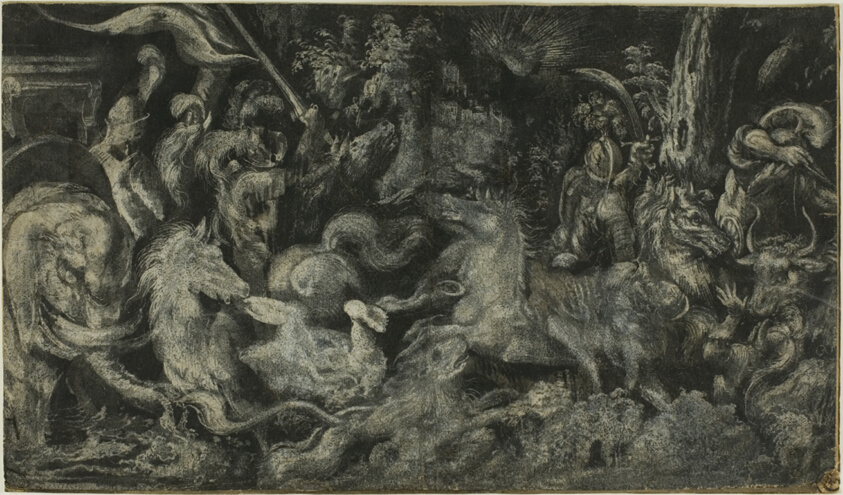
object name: Drawing and Watercolor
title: A Nightmare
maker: Melchior Bocksberger (German, c. 1530/35-1587)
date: after 1573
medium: Brush and white gouache on cream laid paper prepared with a black wash, laid down onto a partial ivory laid paper mount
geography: Germany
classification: drawings (visual works); prints and drawing